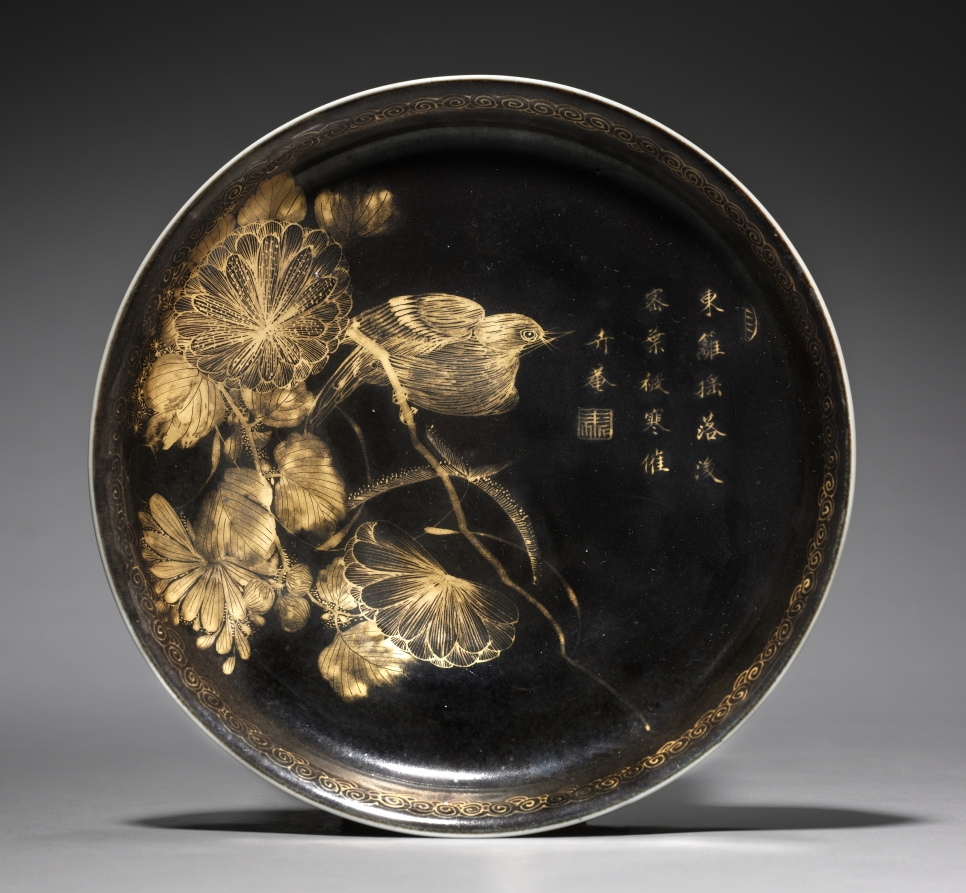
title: Dish with Bird on Chrysanthemum Spray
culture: China, Jiangxi province, Jingdezhen kilns, Qing dynasty (1644-1911), Kangxi reign (1661-1722)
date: 1661–1722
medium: porcelain with mirror black glaze painted with gold decoration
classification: Ceramic